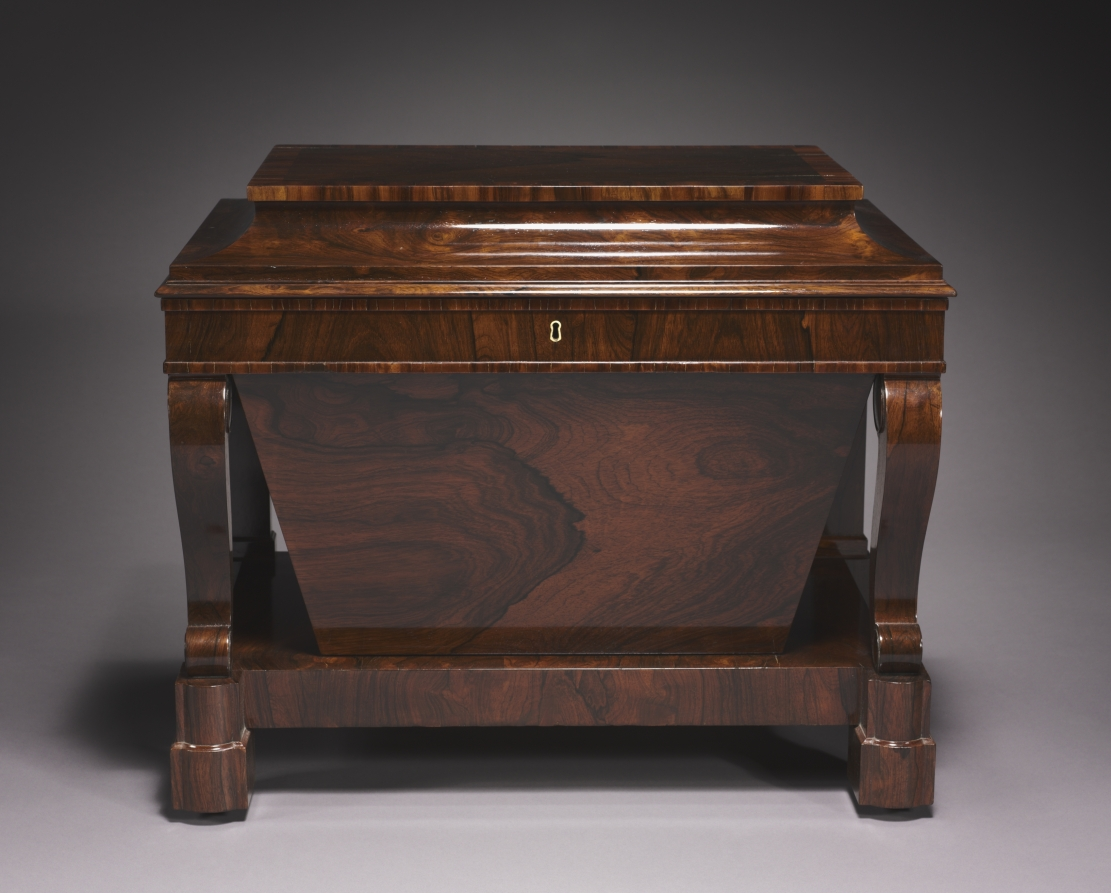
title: Cellarette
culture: America, New York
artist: firm of Duncan Phyfe and Son (American, 1768–1854)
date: c. 1840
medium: chiefly rosewood veneer with pine and poplar secondary woods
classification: Furniture and woodwork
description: Easily the most famous American furniture maker, Duncan Phyfe (born Scotland, 1768-1854) gave his name to New York furniture that is similar to English Sheraton pieces of the early 19th century-characterized by simple designs, straight lines, thin legs, and classical ornamentation. Despite the fashionable success enjoyed by his work, Phyfe responded to stylistic changes, and by the 1830s had evolved a more severe mode that has been termed the "Grecian plain style." This sideboard and its cellarette (a cabinet for storing wine or liquor) are superb examples of that taste, relying for their effect on relatively simple structural forms with ornamentation largely limited to the use of boldly patterned rosewood veneers.